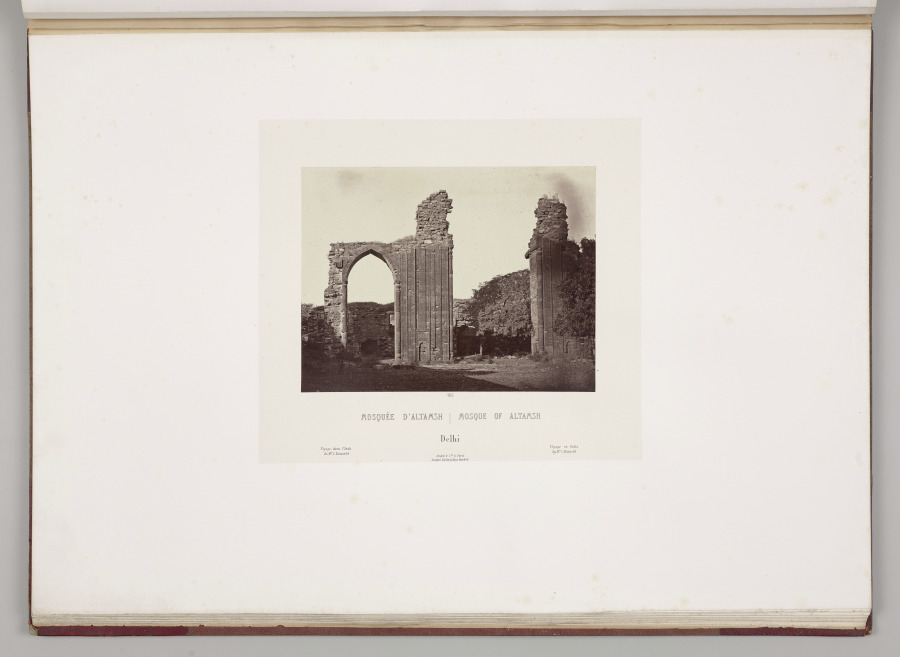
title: Mosque of Altamsh, Delhi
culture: France, 19th century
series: India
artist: Louis-Théophile Marie Rousselet (French, 1845–1929)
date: 1865–68, published 1869–70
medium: Albumen print from glass plate negative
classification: Photograph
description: Concerned that his drawings did not do justice to the splendor of India’s monuments, Rousselet learned photography in India that year, a remarkable accomplishment. He proved to be a talented photographer with a sophisticated sense of composition. The scenes in this volume sweep across sites of Sultanate, Rajput, and Mughal power in northern India, from the sacred Hindu city of Varanasi on the Ganges River to Alwar in Rajasthan. Also included are several scenes of industry and portraits of Indian rulers.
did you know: Louis Rousselet described himself as a “scientific traveler” when he went to India alone at age 18 in 1863 and stayed into 1868.